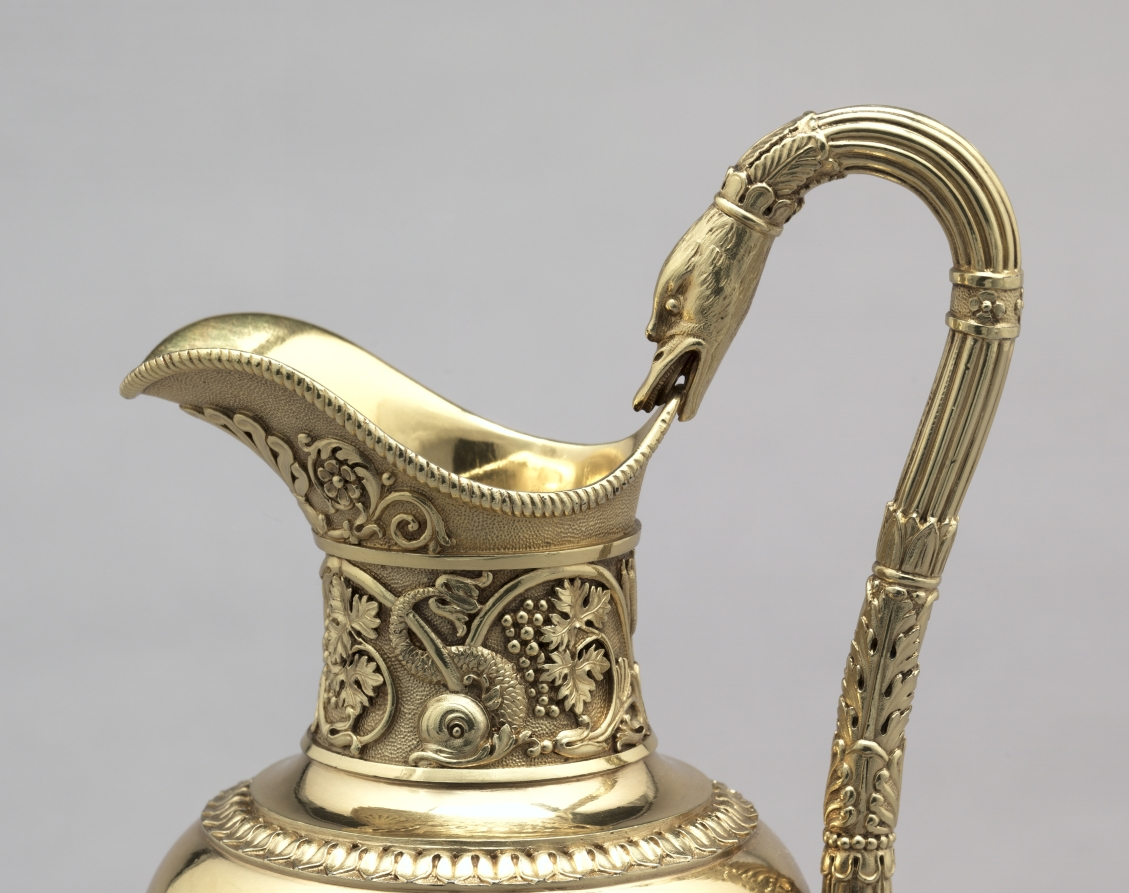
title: Ewer (aiguière)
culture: France, 19th century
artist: Jean Baptiste Claude Odiot (French)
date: c. 1817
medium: silver gilt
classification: Silver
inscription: [Excise mark for medium-sized work, Paris, 1809-1819, on edge of base]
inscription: [Two maker's marks of Jean-Baptiste-Claude Odiot after the Revolution, inside foot]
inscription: [Official assay mark for first standard silver, Paris, 1809-1819, near exterior upper rim]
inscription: [Applied coat of arms of the count Alfred de la Chapelle, Seigneur of Morton and Beaulieu, Périgord “accolé” with an alternate version of de la Chapelle, exterior of foot]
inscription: [Struck twice, interior foot]: "ODIOT"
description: Jean-Baptiste-Claude Odiot’s reputation stretched internationally. Commissioned by Russian count Nikolei Demidoff, this ewer was one part of an extensive silver dinner service. Decorated with motifs of classical antiquity, this object’s Greco-Roman silhouette, grape vine frieze, raised mythological figures, and sinuous swan’s neck handle were likely inspired by the designs of Charles Percier and Pierre-François Fontaine, architects of Napoleon I.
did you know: The coat of arms on the foot of this ewer belongs to the count Alfred de la Chapelle who owned this silver dinner service during the second half of the 19th century.